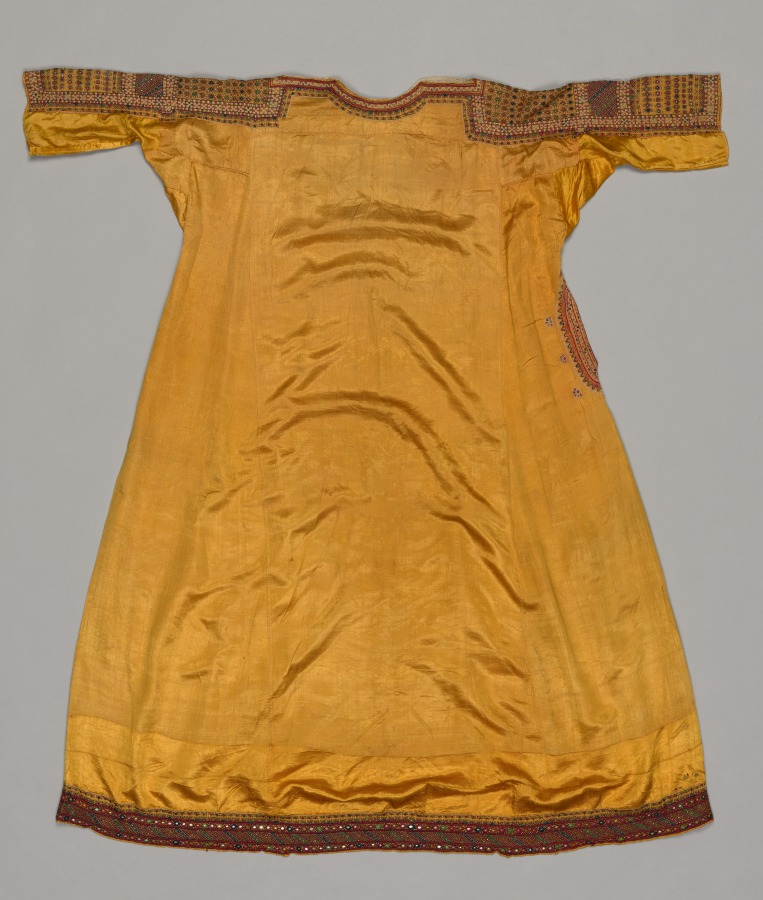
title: Woman's Costume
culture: Western India, Gujarat, Kachchh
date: 1800s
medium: embroidery, silk, embroidery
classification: Garment